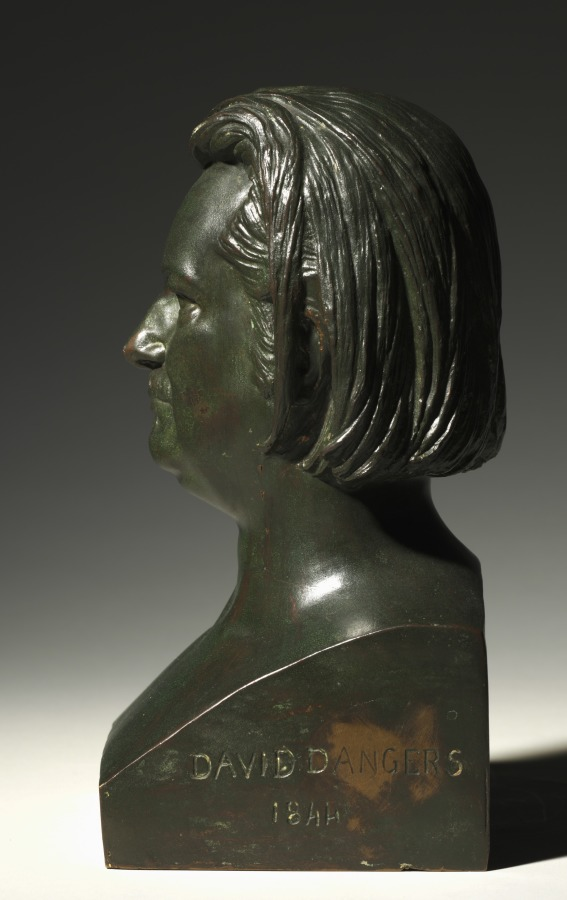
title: Head of Balzac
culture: France, 19th century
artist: Pierre-Jean David d'Angers (French, 1788–1856)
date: 1844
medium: bronze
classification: Sculpture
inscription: inscribed in lower front: "DE BALZAC." The artist's name and date ("DAVID DANGERS/1844") are inscribed on the left side, and the foundry's name ("F. BARBEDIENNE FONDEUR") is inscribed on the back. All inscriptions were made in the mold.